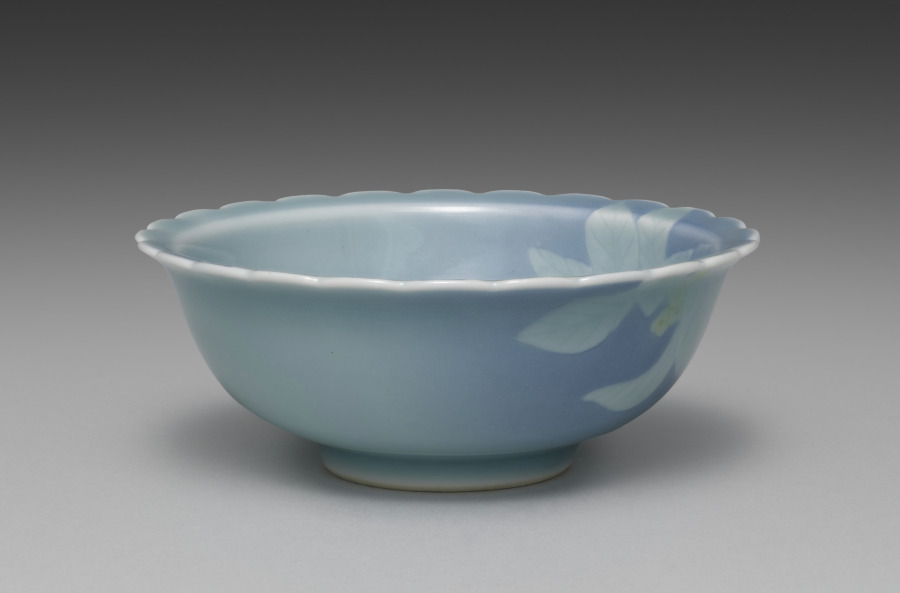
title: Dish from Dishes with Flowers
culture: Japan, Taishō period (1912–26) or Shōwa period (1926–89)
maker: Seifū Yohei IV (Japanese, 1872–1951)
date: 1914–46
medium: One from a set of five dishes; porcelain with underglaze yellow and blue glaze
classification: Ceramic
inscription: 清風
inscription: 清風造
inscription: 成山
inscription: 清風盧人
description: One can imagine a cool summer breeze when looking at this set of dishes, each shaped with a crenulated mouth and glazed with blue. Around the rim and into the basin, the bowls have low-relief designs of flowers with underglaze yellow petals; their leaves and stems show white through the glaze. On each dish, the design continues over the rim onto one side.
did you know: Seifū Yohei IV’s dishes with flowers feature underglaze yellow.